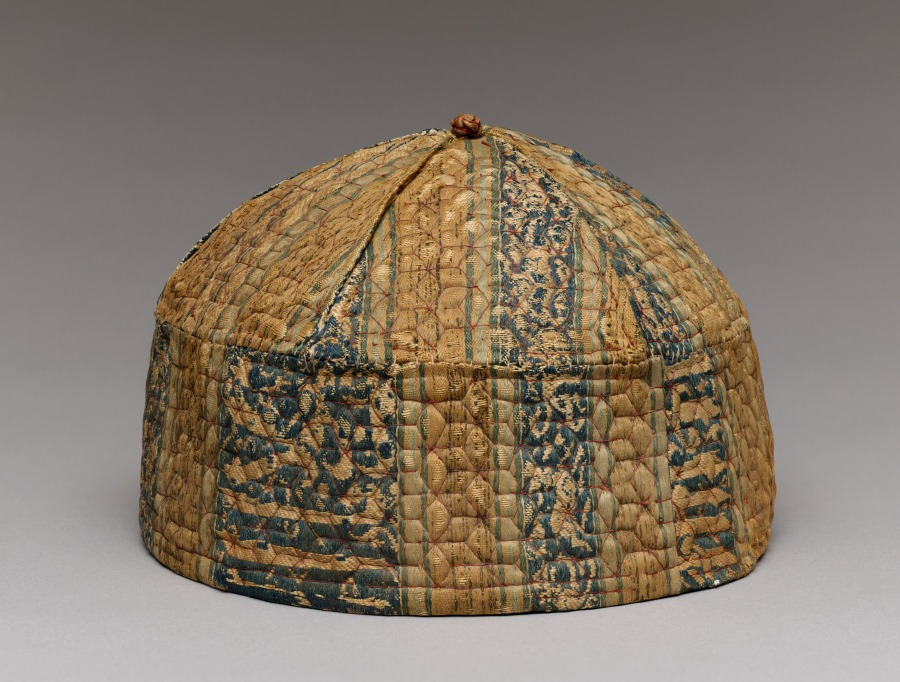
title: Cap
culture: Syria or Egypt, Mamluk Dynasty (1250–1517)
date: 1300s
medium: lampas, quilted: silk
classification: Textile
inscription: 1) Glory to our Lord, the Sultan 2) Glory to our Lord, the Sultan al-Malik, al-Nasir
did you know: The winter-weight quilted cap was part of a set with a matching quilted vest.